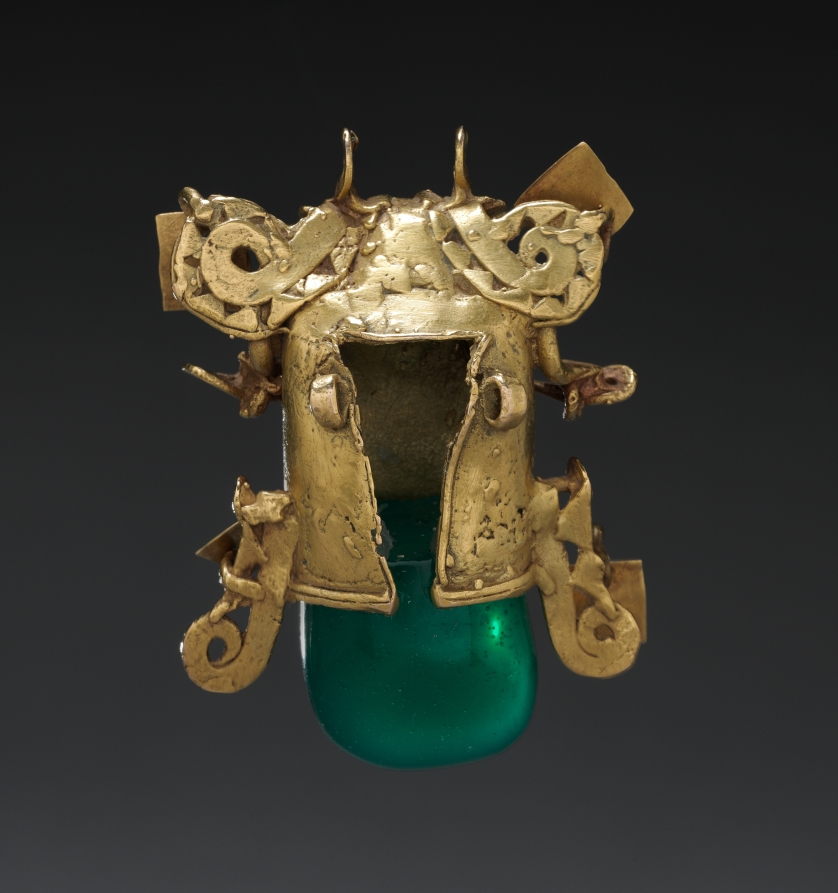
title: Crocodile Pendant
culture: Panama, Azuero Peninsula, Parita style, 11th-16th century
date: 1000–1550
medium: cast gold, modern greenstone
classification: Metalwork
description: Of great importance in ancient Panama were beings that combined crocodile features, especially the mouth, with lizard traits, such as the iguana’s head crest. This example also has a back-swept nose, perhaps that of the leaf-nosed bat. The greenstone is a modern replacement for a stone or shell that once completed the crocodile’s body.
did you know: The greenstone replaced a piece of carved whale bone that was once improperly paired with the pendant.